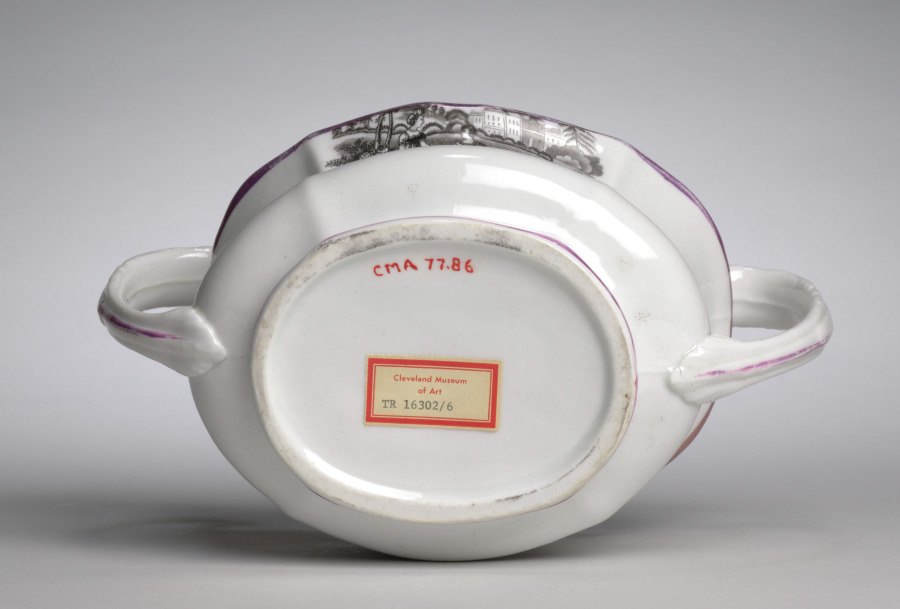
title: Sugar Bowl and Lid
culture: England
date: c. 1800–1825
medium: earthenware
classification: Ceramic